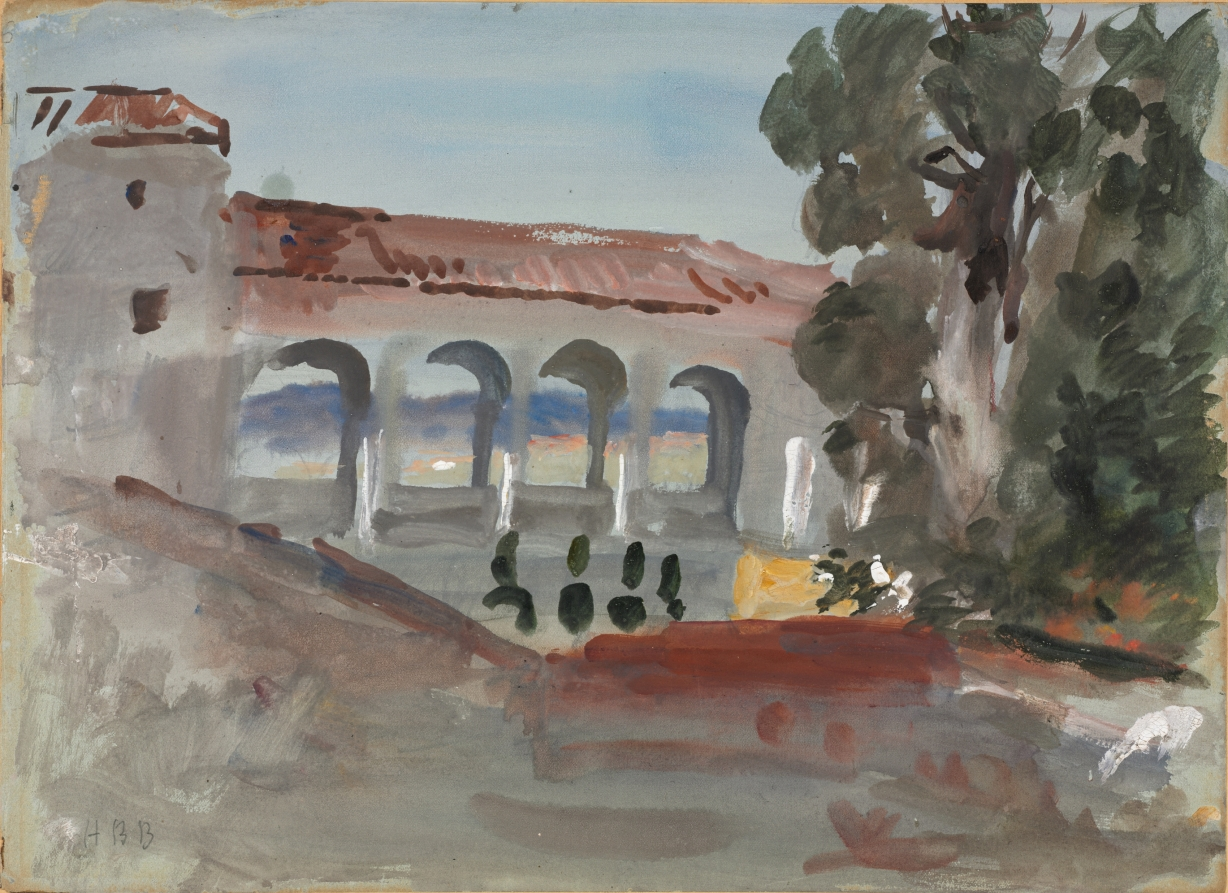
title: Generalife, Granada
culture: England, 19th century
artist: Hercules Brabazon Brabazon (British, 1821–1906)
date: c. 1847–1906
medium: watercolor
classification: Drawing